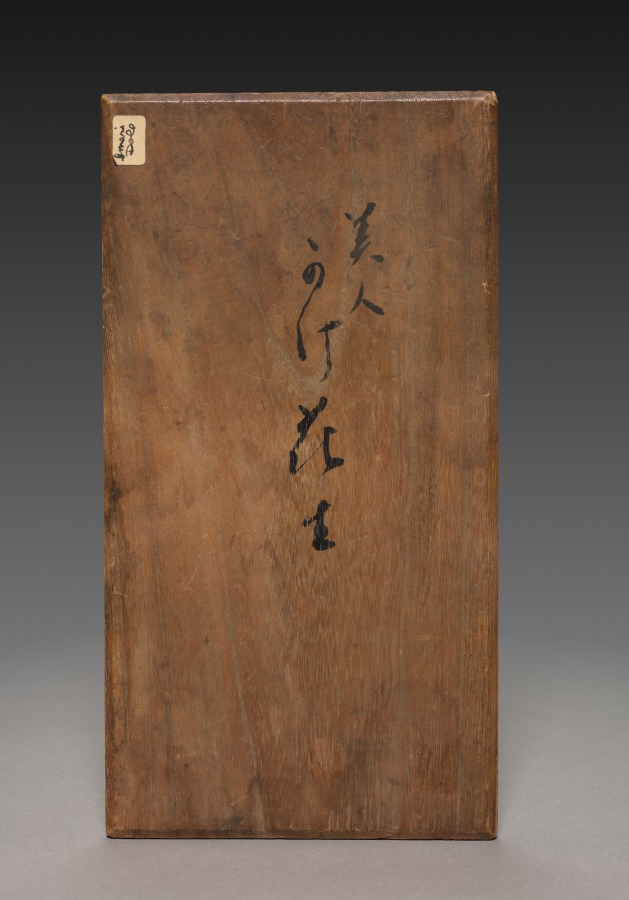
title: Standing Figure of a Beauty: Arita Ware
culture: Japan, Edo period (1615–1868)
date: 1600s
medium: porcelain with overglaze enamel decoration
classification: Ceramic